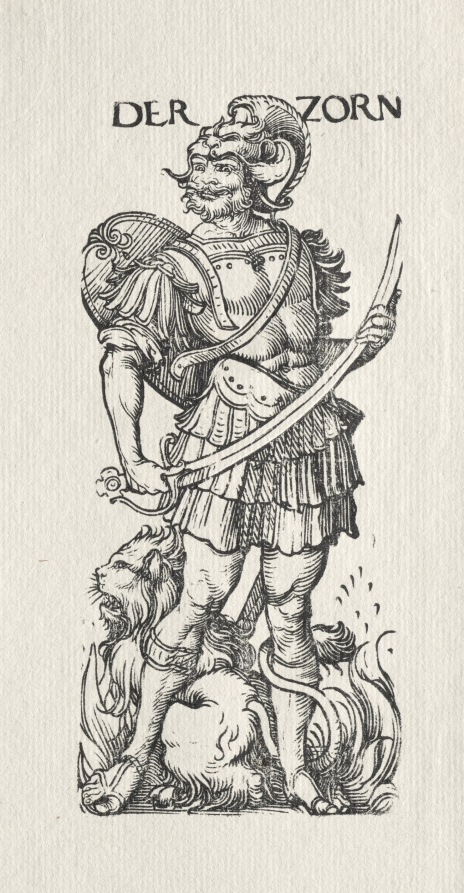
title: The Seven Vices: Wrath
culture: Germany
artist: Hans Burgkmair (German, 1473–1531)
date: c. 1510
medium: woodcut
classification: Print